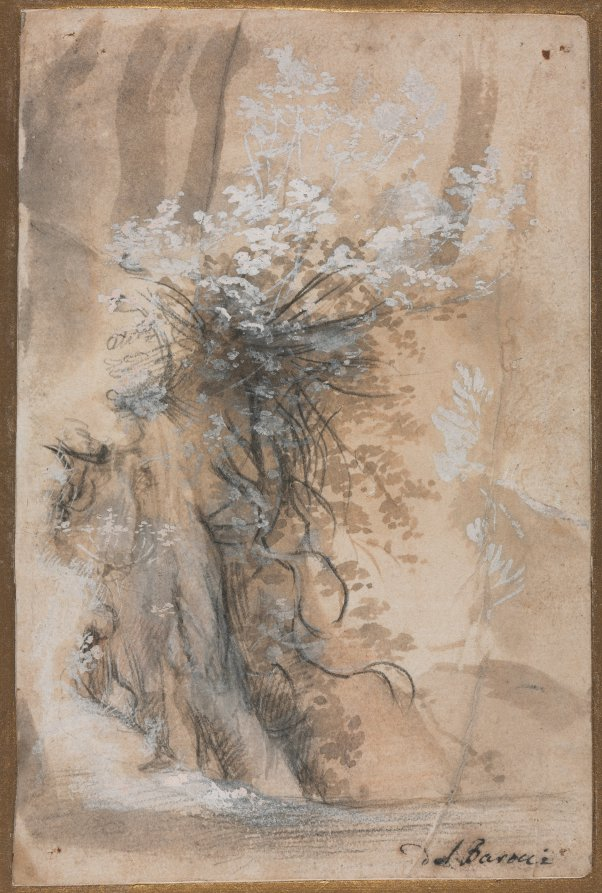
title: Flowering Bush above an Eroded Bank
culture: Italy, 16th century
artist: Federico Barocci (Italian, 1528–1612)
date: c. 1572–1604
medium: black chalk, brush and brown wash, and lead white (partially oxidized), with traces of red chalk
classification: Drawing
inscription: lower right, in brown ink: del Barocci ; VERSO, across top, in brown ink: Originale del Barocci ; lower right, in graphite: D217EHLX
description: Federico Barocci, who worked in Urbino, made landscape sketches for use in his paintings and as independent studies. The artist’s multimedia approach—combining chalks, ink washes, and opaque paints—was novel at the time but would become standard practice for landscape artists working in later centuries. Novel, as well, was his interest in excerpts of the natural world rather than fully realized scenes. Here, the artist drew an eroded bank with a few bold lines in black chalk, then used a brush to layer brown and white ink washes, capturing the untamed clump of earth with remarkable naturalism.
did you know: This drawing is believed to have once been in the collection of two brothers who were considered the premier academic painters in 19th-century Rome.